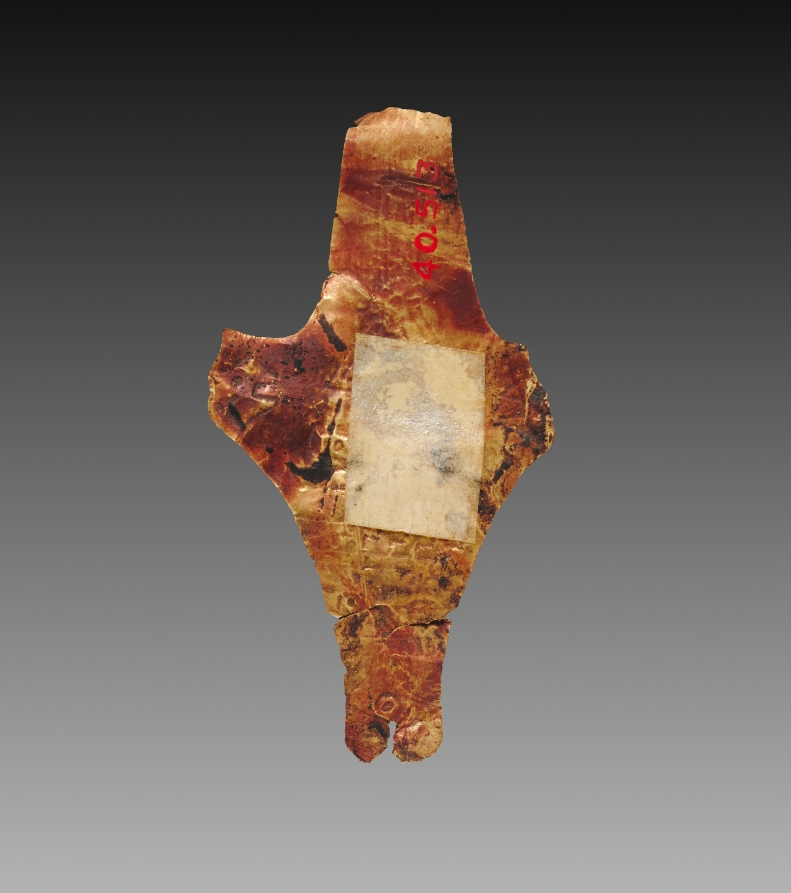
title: Ornament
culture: Peru, South Coast, Ica Valley?, Paracas, c. 300 BC-AD 100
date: c. 300 BCE–100 CE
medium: hammered and embossed gold-copper alloy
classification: Jewelry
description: With its grinning mouth and long, protruding tongue, the face embossed on this fragmentary ornament resembles linear images painted on mummy masks and woven on doublecloth tunics and mantles. Both painted mummy masks and doublecloth garments are most often found in the Ica Valley, a short distance south of the Paracas Peninsula. The ornament's original function is uncertain.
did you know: Tumbaga is an alloy made by blending gold with copper, which may give the gold a rosy hue.